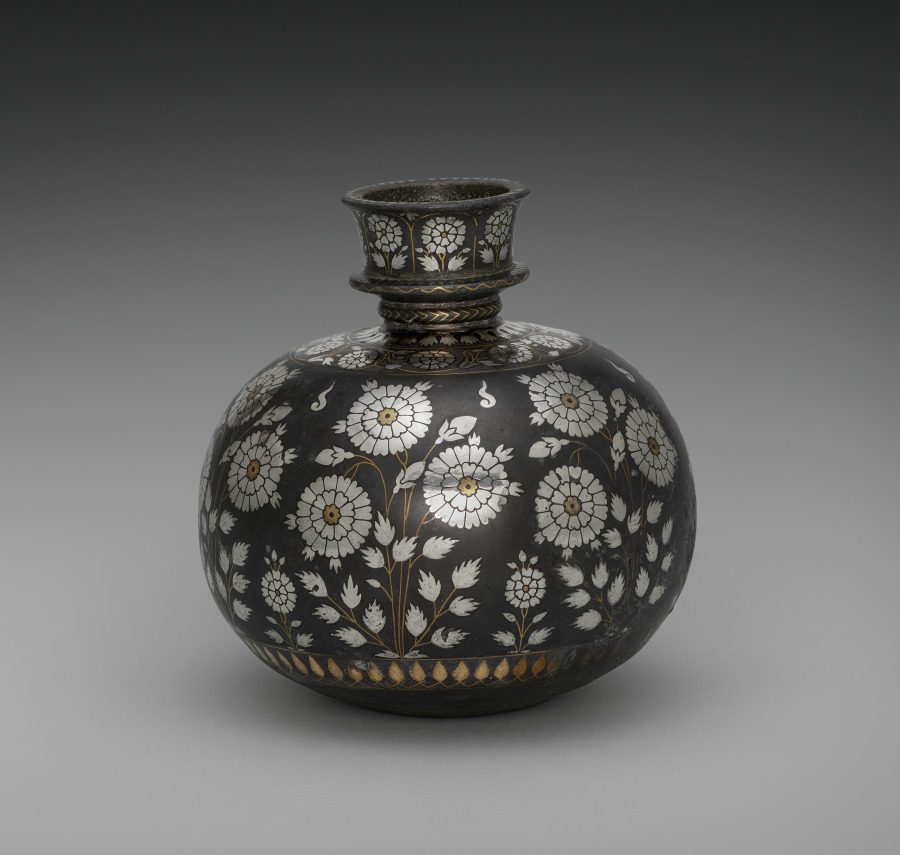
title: Bidri Hookah Bowl with Roses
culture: Southwestern India, Deccan, Karnataka, Bidar​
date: c. 1650s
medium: Zinc alloy with silver and brass inlay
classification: Metalwork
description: Hookah bowls were used for the enjoyment of tobacco or any other smoked substance during moments of relaxation. They were also aesthetic objects to be admired in elite gatherings of connoisseurs. The flowering rose bushes on this fine early example, made shortly after the introduction of tobacco-smoking in India, would have called to mind celebrated poetical works, such as the Gulistan (Rose Garden) of Sa'di (Persian, 1210–1291 or 1292).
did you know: Bidri ware is cast from condensed vapors of zinc mined from Sawar in Rajasthan.